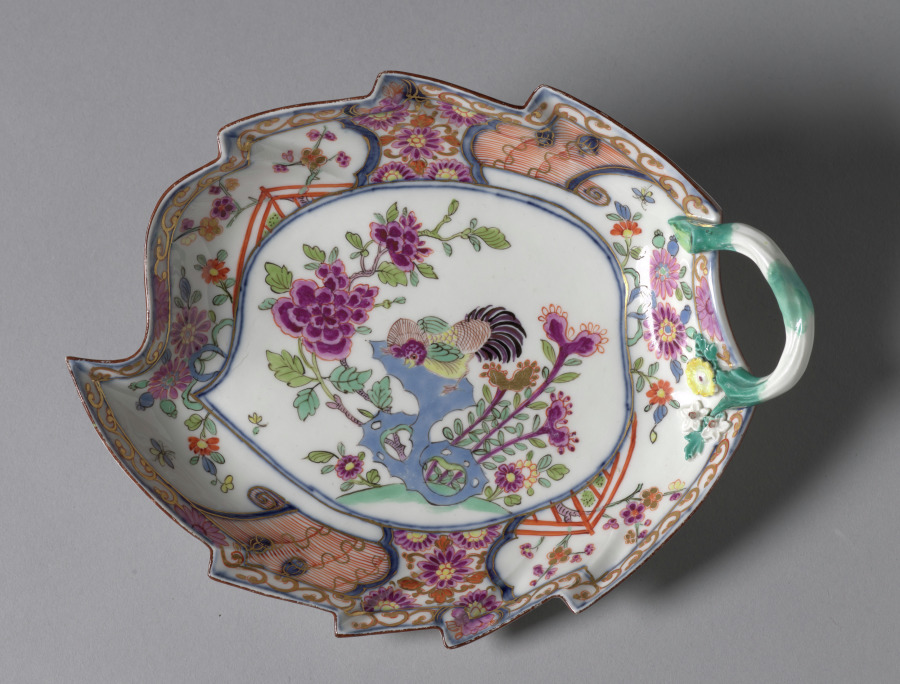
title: Leaf Dish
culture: Germany, Meissen, 18th century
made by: Meissen Porcelain Factory (German, est. c. 1710)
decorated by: possibly by Johann David Kretschmar (German)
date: c. 1735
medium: porcelain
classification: Ceramic